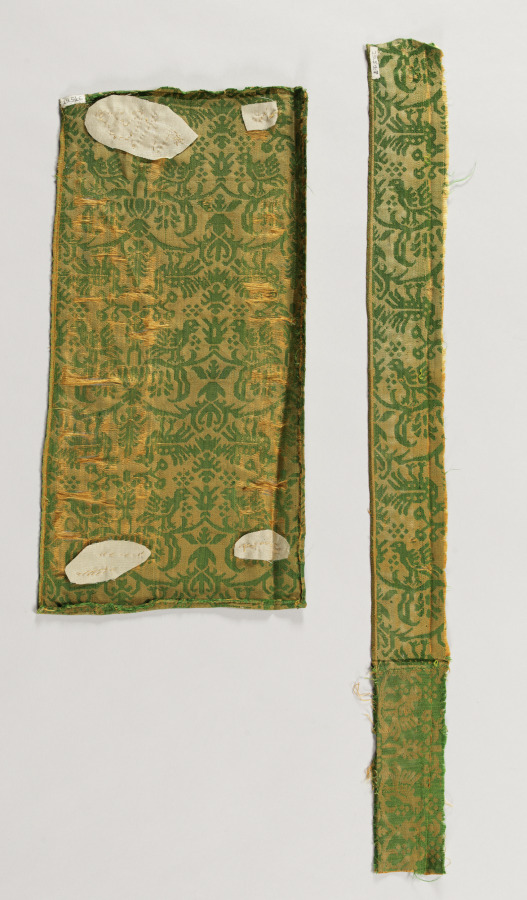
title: Fragments of Silk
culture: Spain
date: early 1600s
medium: silk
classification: Textile